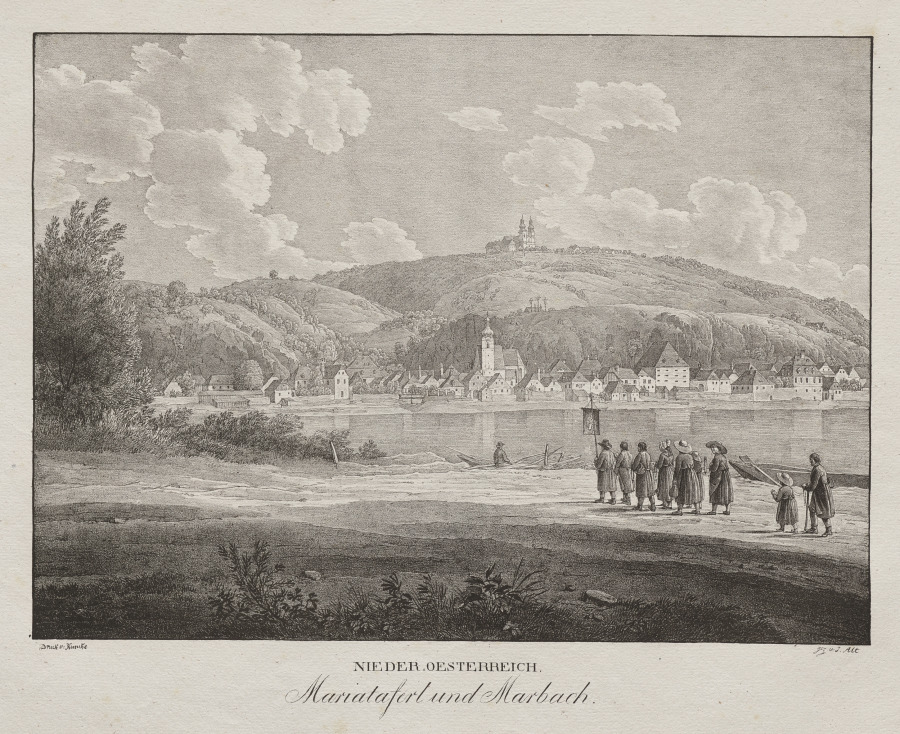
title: Nieder-oesterreich, Mariataferl und Marbach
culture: Austria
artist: Jakob Alt (Austrian, 1789–1872)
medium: lithograph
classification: Print